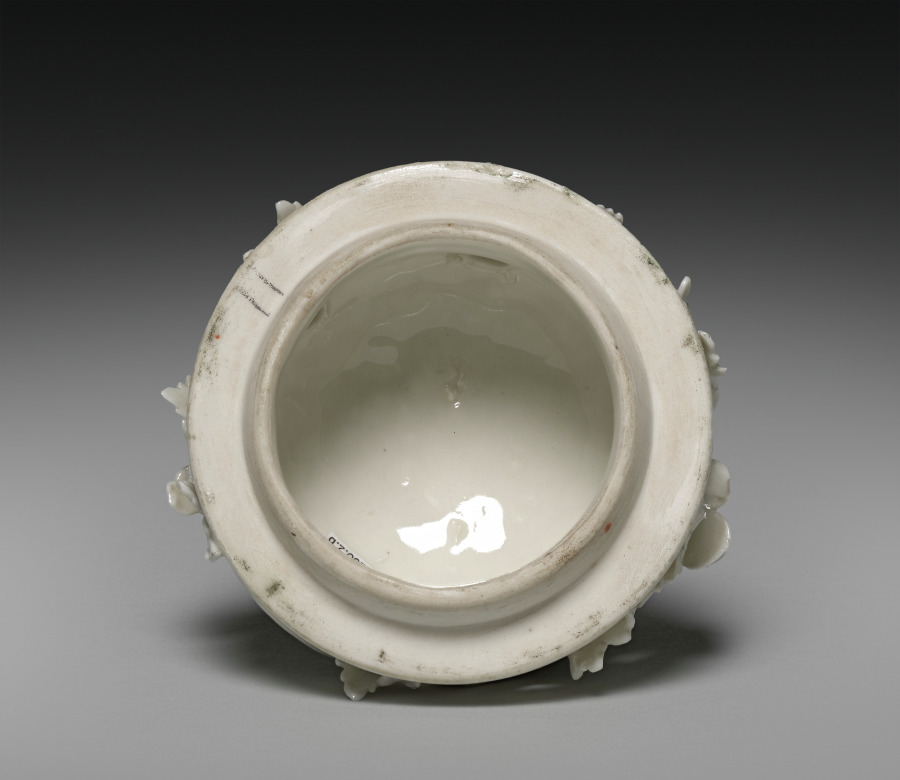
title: Cover for a Potpourri Vase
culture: France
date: 1860–80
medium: blanc-de-chine porcelain; gilt bronze mount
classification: Ceramic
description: This cover is part of a pair of covered vases that were created to contain potpourri, a mixture of flowers, herbs, and spices emitting ambient fragrance. This specific function offered a particularly fertile ground for the development of French porcelain from the mid-1700s, as manufactories experimented with forms, surface ornamentations, and placement of perforations. Produced by the firm of Edmé Samson in the 1800s, the vases pay homage to this history. While using updated technique and material, as well as more exuberant decorations, these vases draw upon designs by earlier innovators such as the Saint-Cloud manufactory.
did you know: Potpourri vases always have holes in the top to let the scent of dried spices and flowers contained within freshen the air around them.